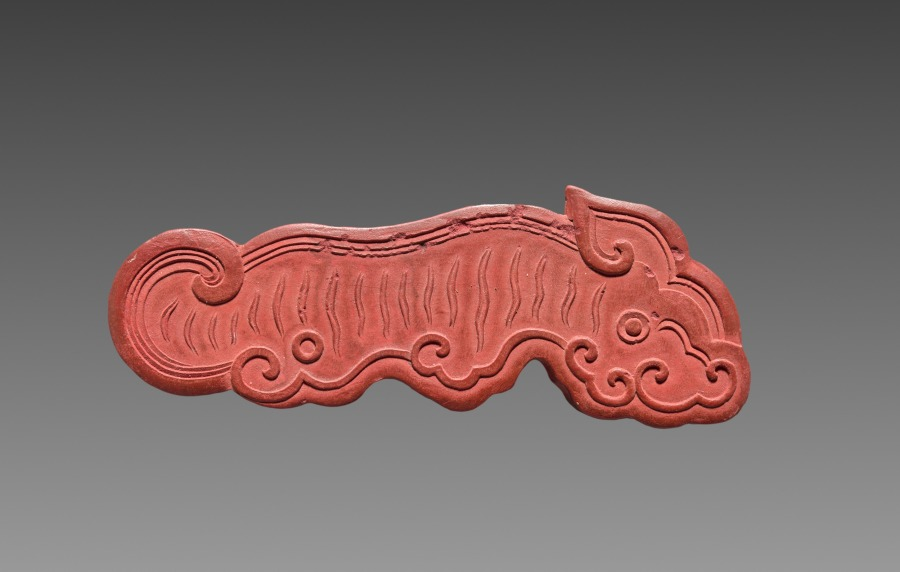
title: Box with Ink Cakes: Red Ink Cake in Shape of a Kui Dragon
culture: China, Qing dynasty (1644-1911), Jiaqing reign (1795-1820)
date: 1795–1820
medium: Molded ink in red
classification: Miscellaneous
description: Ink cakes (also called ink sticks) are dissolved with the addition of water and then ground on the surface of a flat square stone into liquid ink for painting and calligraphy. The precious ink cakes here, however, have never been used. The inscription on the side of the blue ink cake says that the set was commissioned by Chen Huai, Governor of Jiangxi Province.